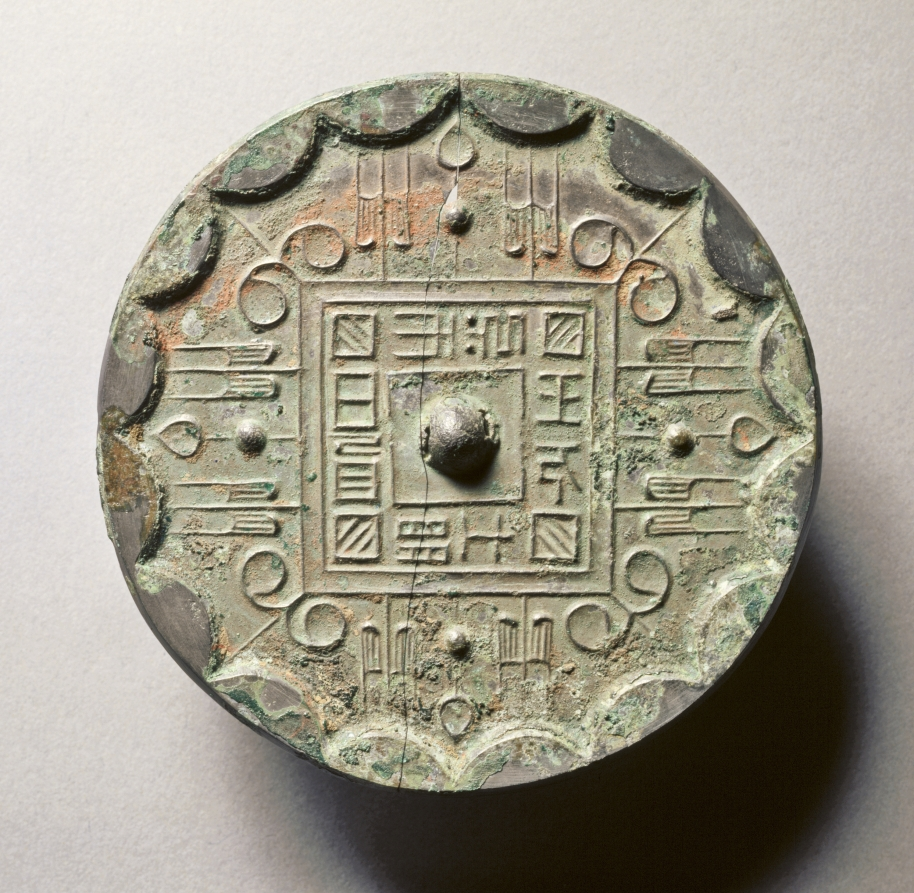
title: Mirror with a Square Band, Four Nipples, and Grass Leaf Motifs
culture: China, Western Han dynasty (206 BCE–8 CE)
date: late 300s BCE–50 CE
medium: bronze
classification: Metalwork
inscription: By the light of the sun, the world is made bright.